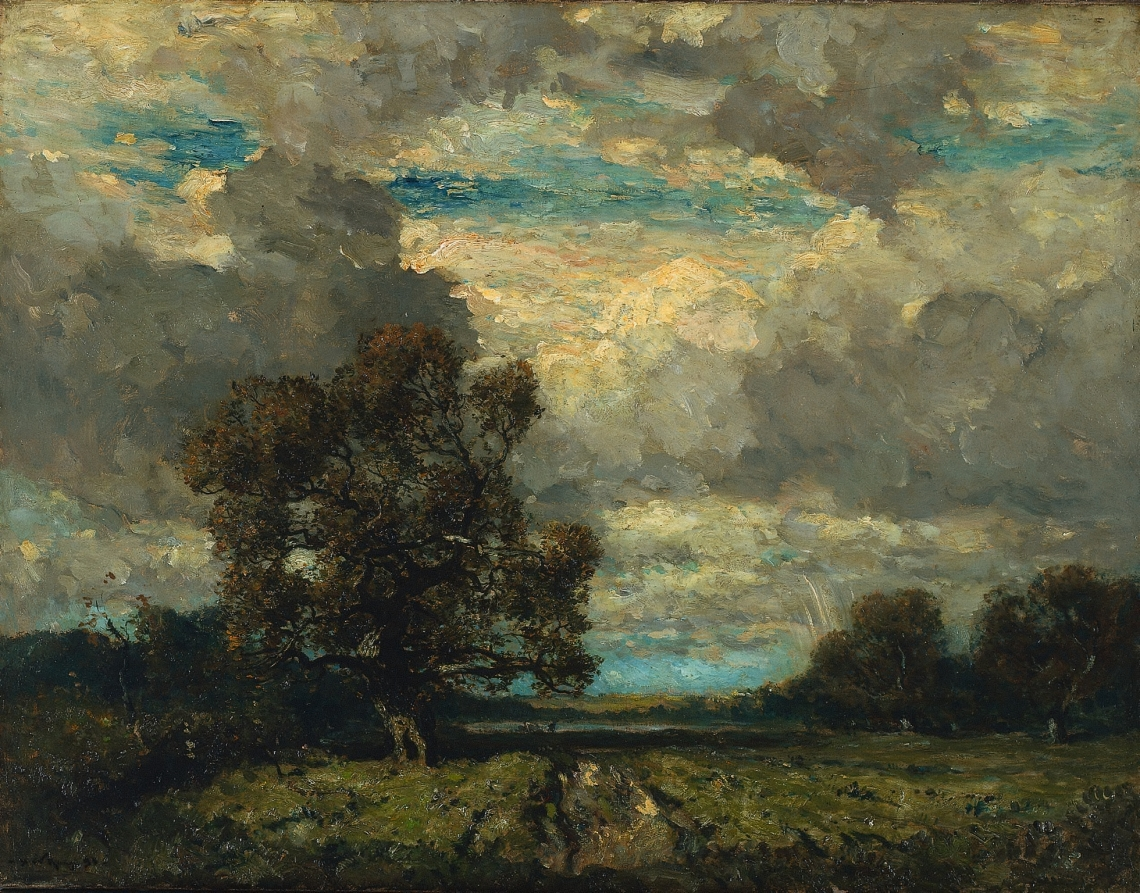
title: The Lone Sentinel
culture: America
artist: Henry Ward Ranger (American, 1858–1916)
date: 1895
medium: oil on canvas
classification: Painting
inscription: Signed lower left: "H W Ranger 95"